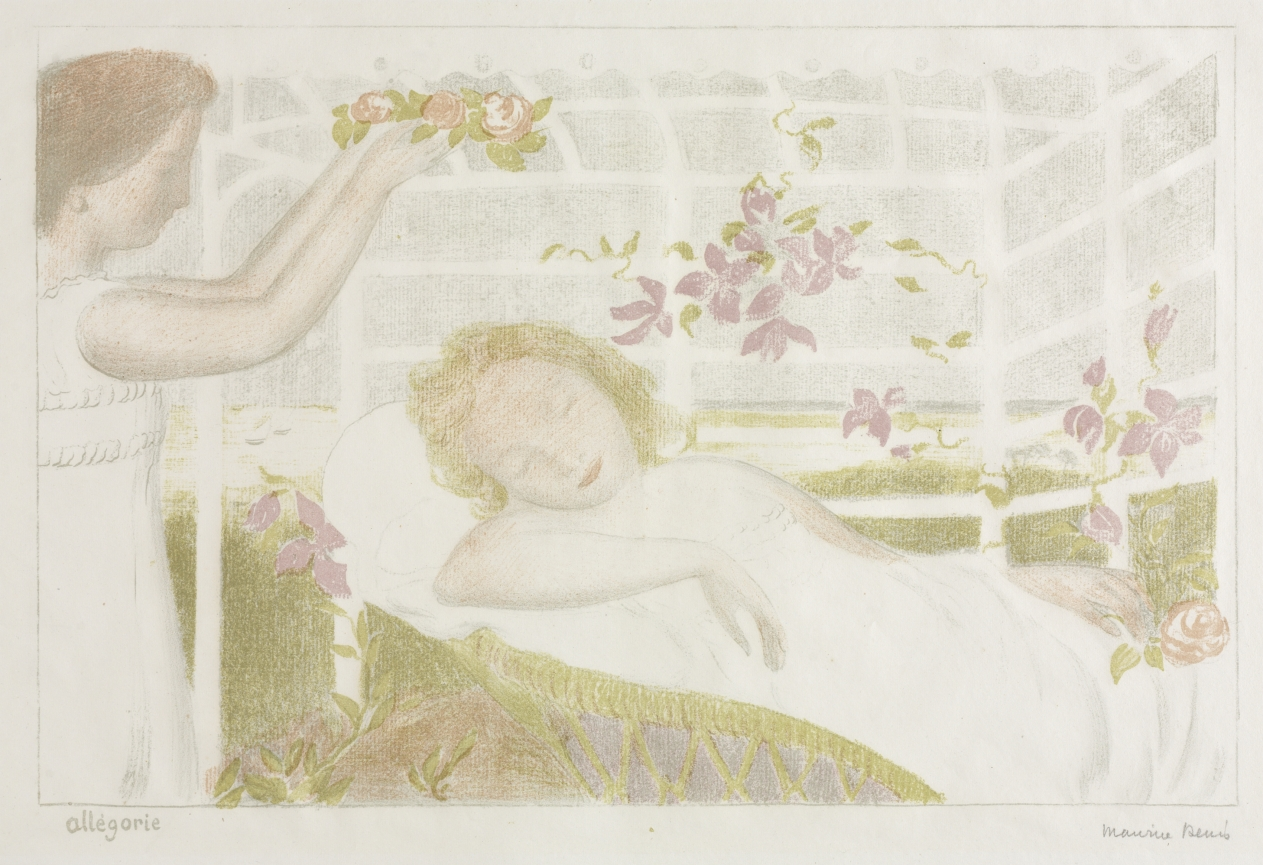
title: Allegory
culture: France, 20th century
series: Love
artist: Maurice Denis (French, 1870–1943)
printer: Auguste Clot (French, 1858–1936)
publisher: Ambroise Vollard (French, 1867–1939)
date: 1898, published 1899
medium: color lithograph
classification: Print